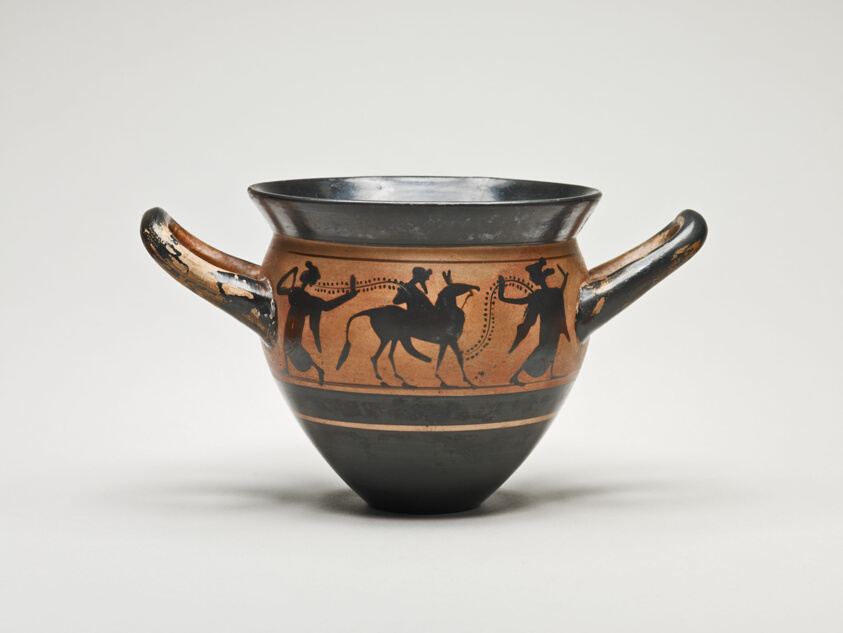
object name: Vessel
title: Mastoid (Drinking Cup) with Handles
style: attic, black-figure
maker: Attributed to the Manner of the Haimon Painter; Greek; Athens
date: 500-480 BCE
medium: terracotta, black-figure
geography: Athens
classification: drinking vessel; ceramics; vessel; ancient art